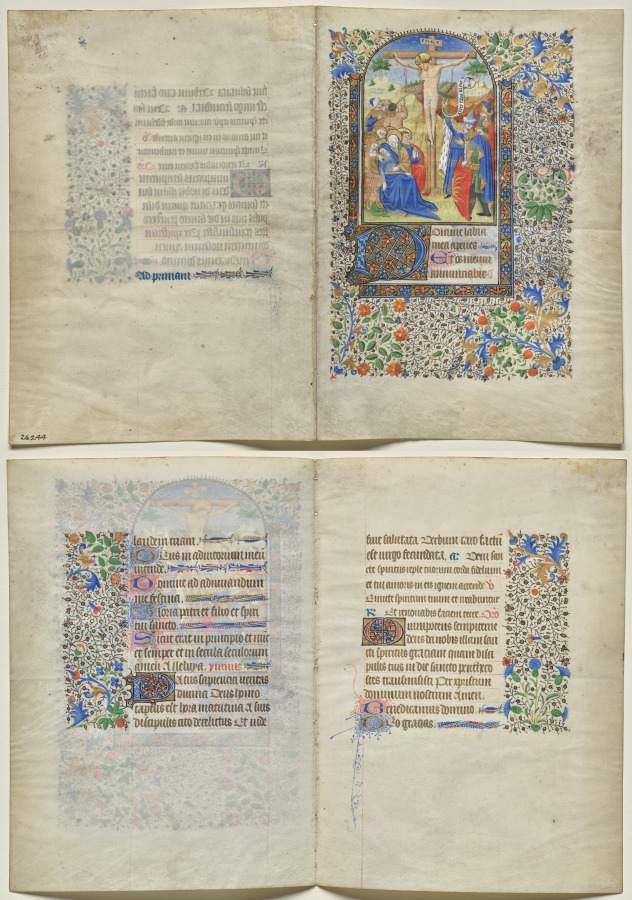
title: Bifolio from a Book of Hours: The Crucifixion (recto), Text (verso)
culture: France (Angers, Nantes, or Poitiers)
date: c. 1435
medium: ink, tempera, and gold on vellum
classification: Manuscript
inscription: Domine labia mea aperies et os meum adnuntiabit…[laudem tuam]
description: In most books of hours, the Hours of the Cross and the Hours of the Holy Spirit are much shorter than the Hours of the Virgin. Like the Hours of the Virgin, each hour consists of specific hymns, devotional poems, and prayers to be said throughout the day. Accompanying illustrations are either events surrounding the Crucifixion or the Pentecost, the descent of the Holy Spirit on the disciples of Jesus after his ascension to heaven. Traditionally, the Hours of the Cross begins with a scene of the Crucifixion of Christ. The illumination, or illustration, can help determine which series is indicated, as the Hours of the Cross and Holy Spirit begin with the same text. After 1400, such text no longer appeared solely in Latin but could be in French or Dutch, making it more accessible to laypeople.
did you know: The images and decorated initials in the book of hours were used to provoke meditation and prayer, leading to books of hours sometimes being referred to as “painted prayers.”